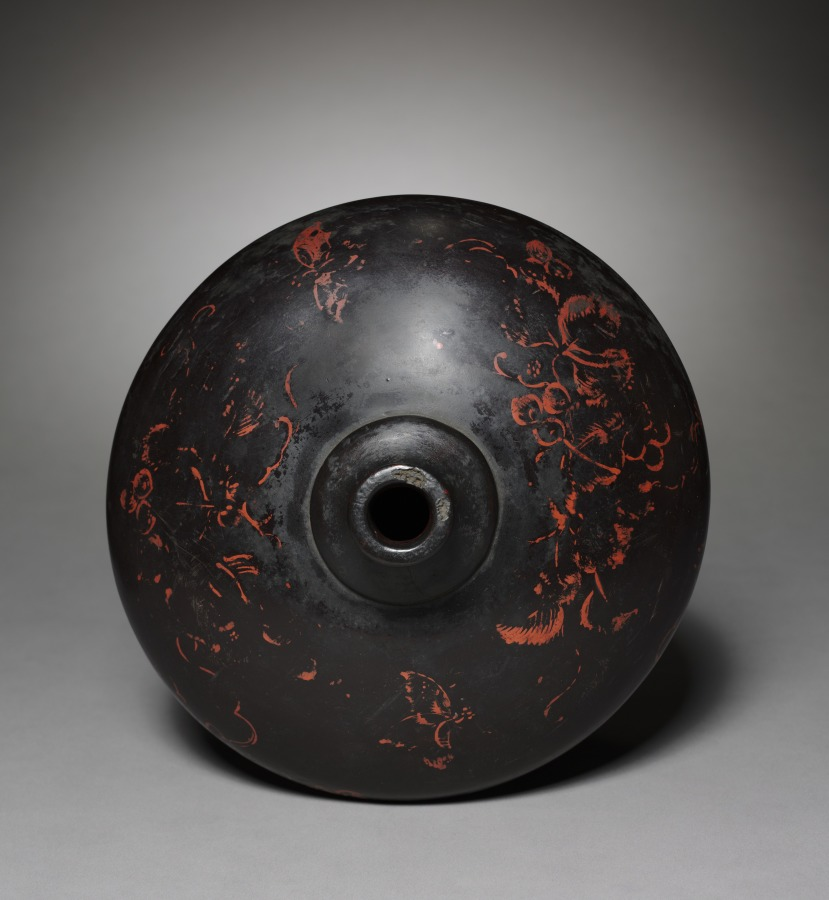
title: Sake Flask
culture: Japan, Muromachi period (1392–1573)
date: 1500s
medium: Black laquered wood with red lacquer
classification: Lacquer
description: This flask contained rice wine, or sake. Its wood body was shaped by a lathe before black lacquer was applied to the surface. A red lacquer design of grapevines, an auspicious motif, covers the surface. With their numerous, long-lasting fruits, grapevines traditionally symbolized fertility and longevity in East Asia.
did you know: The evocative imagery of brushed leaves and bunches of grapes suggest that the artist referred to a particular painting when decorating this vase.